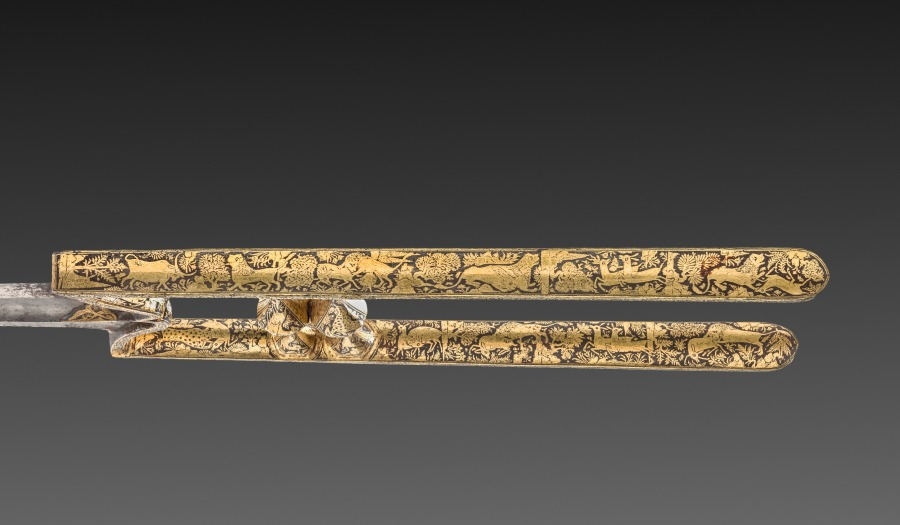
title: Katar (Stabbing Dagger)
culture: India, Mughal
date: 1700s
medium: Iron handle with gold inlay; steel blade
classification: Arms and Armor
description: Stabbing daggers called katar were distinctive to India and often worn by soldiers and courtiers, tucked into their belts. Covering the entire handle are tiny scenes of lions and cheetahs hunting deer and buffalo in rocky wooded settings.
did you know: The ornament on the handle faces up from the perspective of a right-handed user, on all sides.